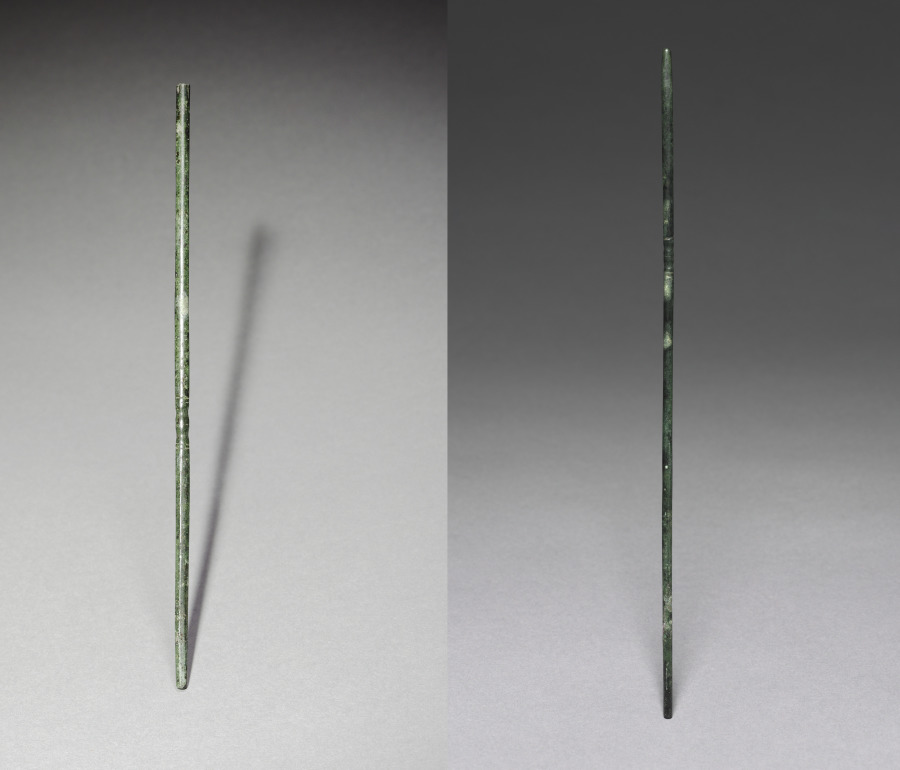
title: A Pair of Chopsticks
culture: Korea, Goryeo dynasty (918–1392)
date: 918–1392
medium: bronze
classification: Metalwork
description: In Korea, chopsticks made of metal such as brass, silver, and gold were excavated from ancient tombs and ruins dated to the 6th century at the earliest. Burial goods often include utilitarian objects such as table wares and utensils because the dead were believed to need them in the afterlife.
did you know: In contrast to the Chinese and Japanese, Koreans still prefer metal chopsticks (stainless steel and brass) to wooden ones.